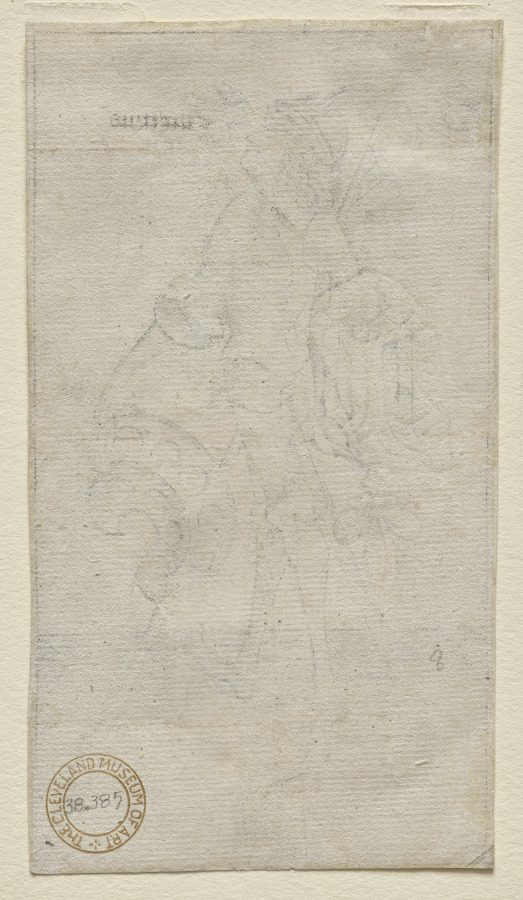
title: St. Quirinus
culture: Germany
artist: Israhel van Meckenem (German, c. 1440–1503)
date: c. 1475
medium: engraving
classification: Print